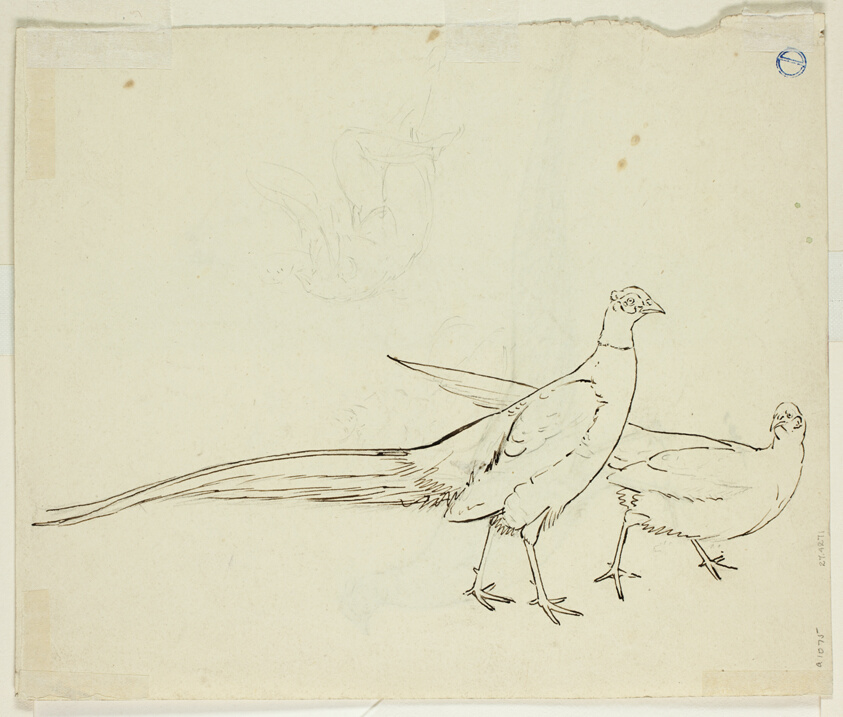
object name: Drawing and Watercolor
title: Two Sketches of Pheasant (recto); Sketch of Pheasants and Female Nude (verso)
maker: Henry Stacy Marks (English, 1829-1898)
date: 1849/98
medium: Pen and brown ink, over graphite (recto and verso), on cream wove paper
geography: England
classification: pen and ink drawings; drawings (visual works); prints and drawing; paper